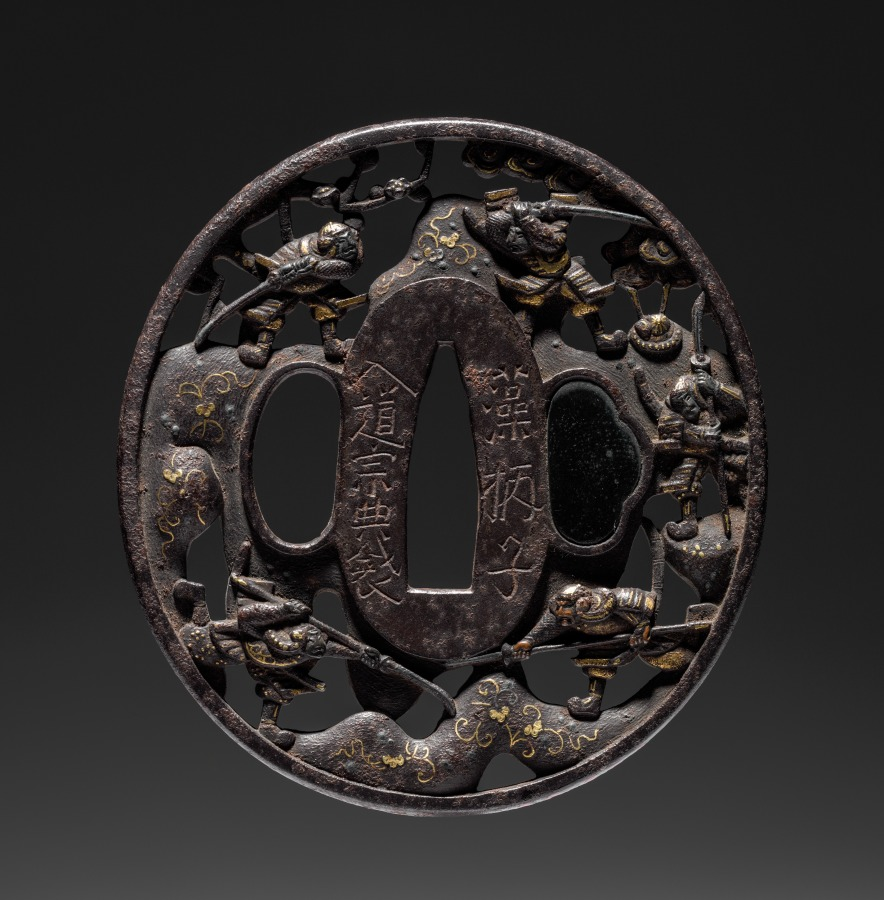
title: Sword Guard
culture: Japan, Edo period (1615–1868)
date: 1600s-1700s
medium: bronze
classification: Arms and Armor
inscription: signed: SOHEISHI: i.e. KITAGAWA SOTEN, founder of the SOTEN School.